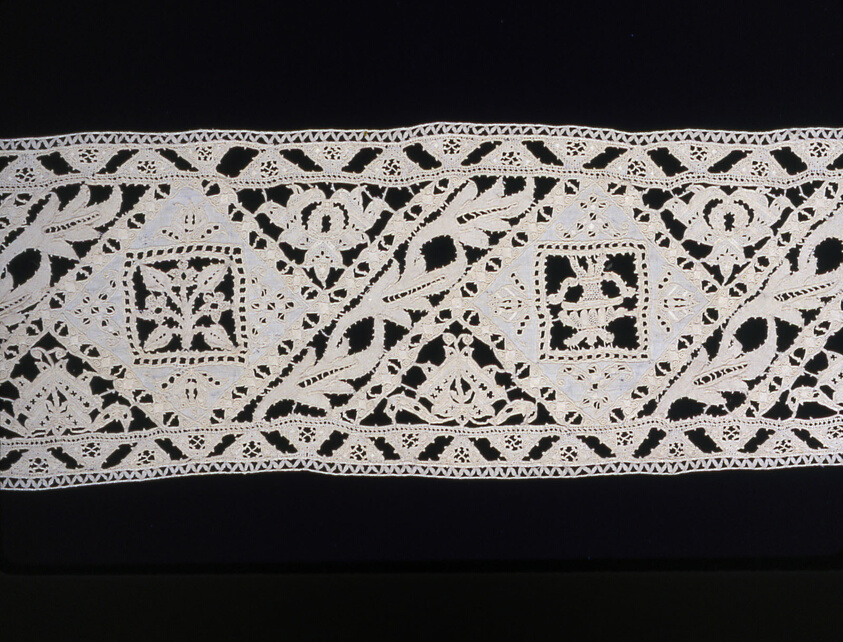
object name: Textile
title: Insertion for Cover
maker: Italy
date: 1575/1600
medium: Linen, plain weave; embroidered in buttonhole, double hem, overcast back, overcast, and satin stitches; eyelet holes; cut and drawn thread work embroidered in buttonhole and hem stitches with needle lace fillings (including: buttonhole and overcast bars, some decorated with woven picots, lace filling stitches, etc., some decorated with buttonhole picots and overcast edges)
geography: Italy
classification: textile; needlework (visual works)